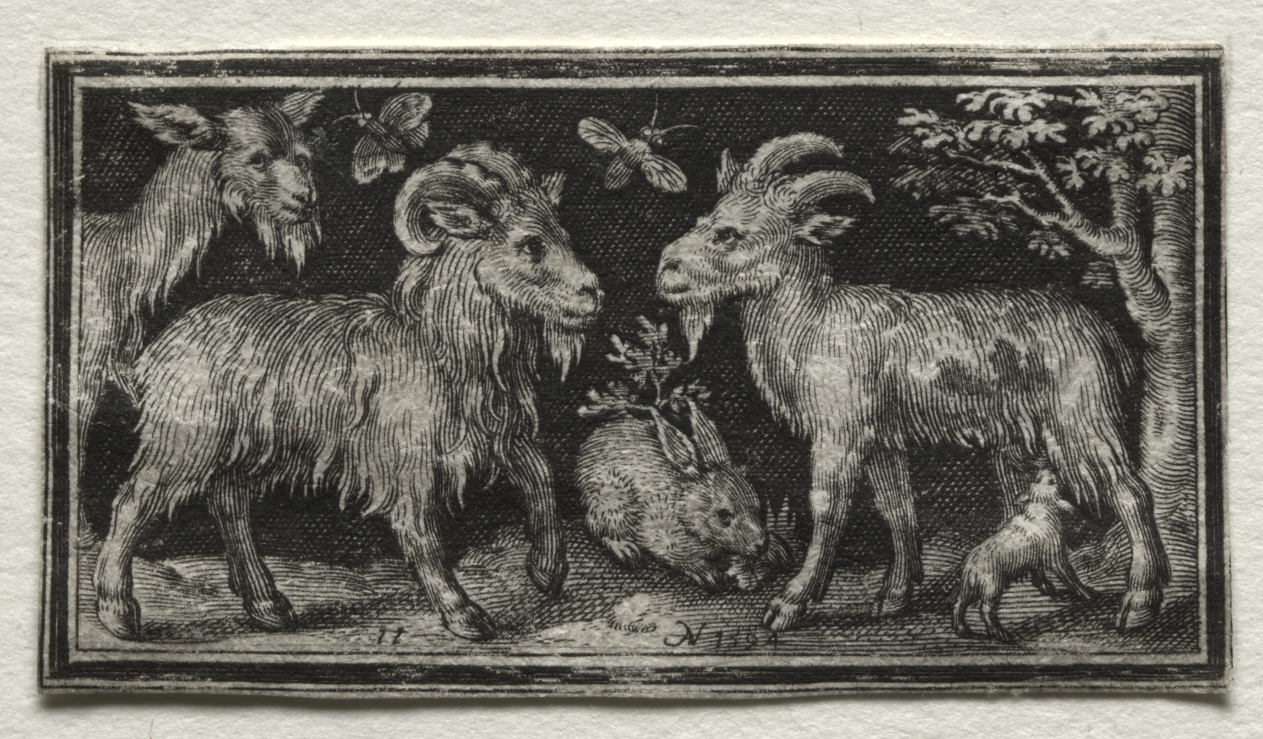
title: Goats and Hare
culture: Netherlands, 16th century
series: Fighting Chimeras and Scenes to Aesop's Fables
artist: Nicolaes de Bruyn (Netherlandish, 1571–1656)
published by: A. van Londerseel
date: 1594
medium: engraving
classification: Print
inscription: lower left, in plate: 11 ; lower center, in plate: N 1594 ; VERSO, lower left, in graphite: B4241 ; lower center, in graphite: 9[circled] FPO ; lower right, in graphite: 6264/135